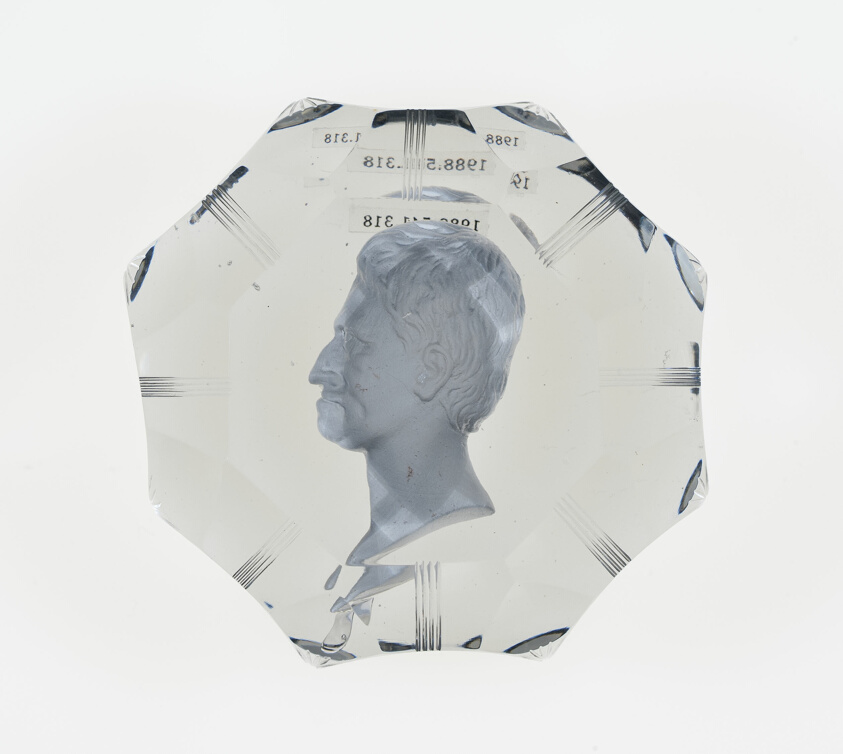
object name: Glass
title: Paperweight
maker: Baccarat Glassworks (Cristalleries de Baccarat); Lorraine, France, founded 1764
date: Mid 19th century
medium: Glass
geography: Baccarat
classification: paperweight; glass